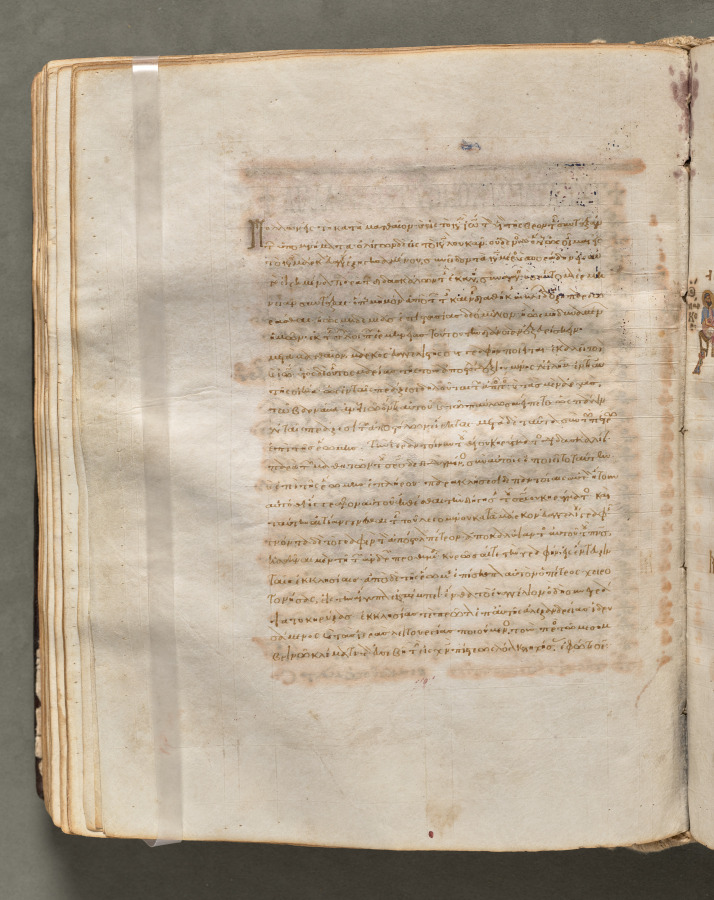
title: Text, folio 131 (verso), from a Gospel Book with Commentaries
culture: Byzantium, Constantinople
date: c. 1000–1100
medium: ink, tempera, and gold on vellum; leather binding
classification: Bound Volume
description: Each of the four gospels in this book opens on a page with brilliantly illuminated borders depicting the author of the text as well as birds-principally peacocks, symbols of the immortality of the soul-and fountains, representing the fountain of life and the salvation of the soul. This volume consists of 428 leaves with texts in Greek. Its level of sophistication suggests that it was probably written and decorated in a monastery in Constantinople.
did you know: Gospel Books were carried in procession through Byzantine churches.